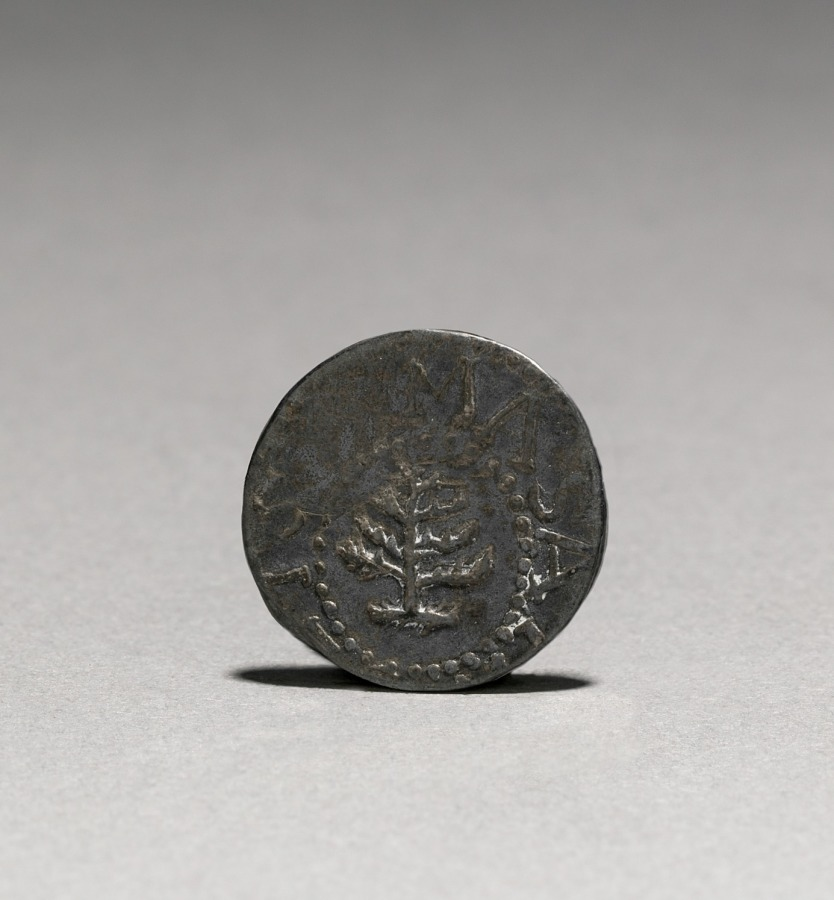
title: Pine Tree Three Pence (obverse)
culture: America, Massachusetts, Boston, 17th century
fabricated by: John Hull (American, 1624–1683)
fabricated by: Robert Sanderson (American, 1609–1693)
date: 1652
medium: silver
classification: Coins